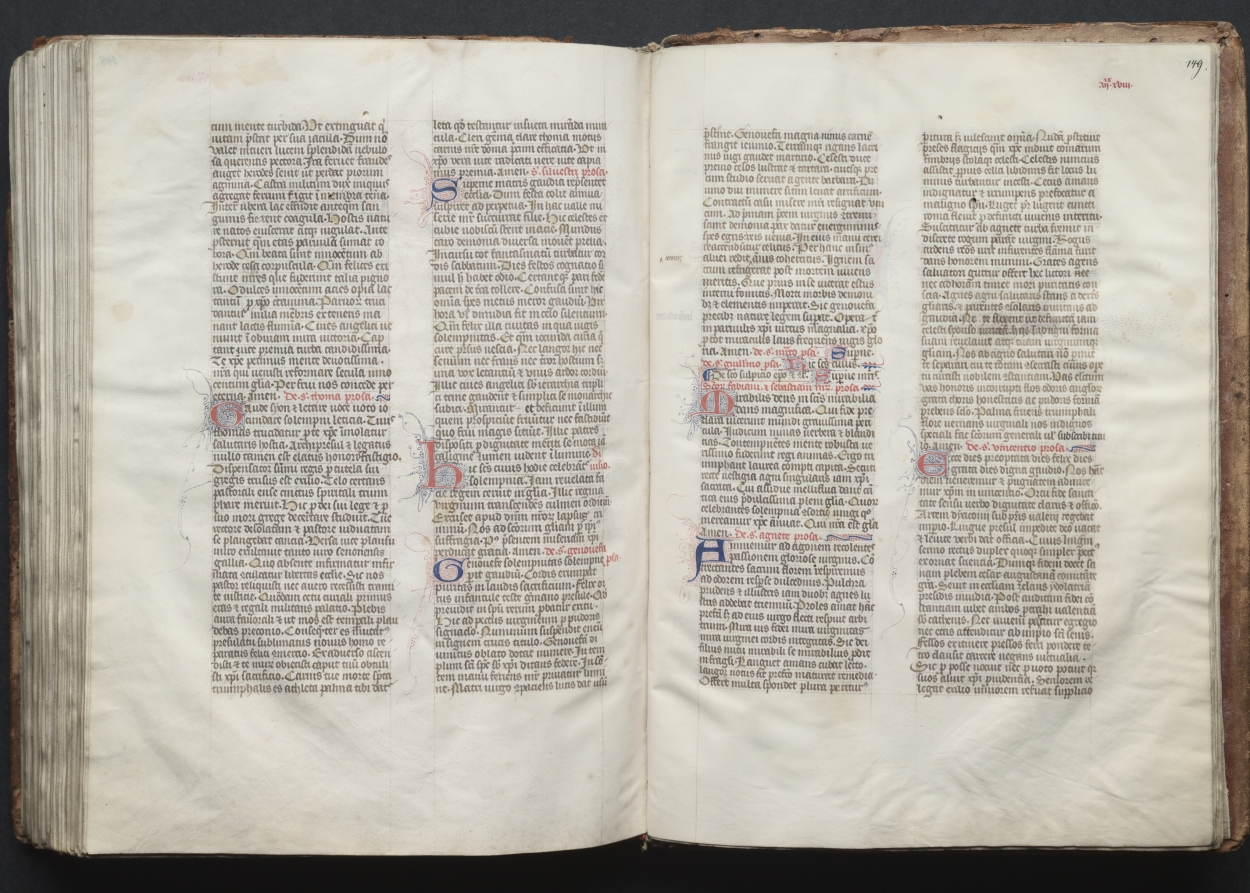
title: The Gotha Missal: Fol. 149r, Text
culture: France, Paris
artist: Master of the Boqueteaux (French)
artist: and Workshop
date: c. 1375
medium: ink, tempera, and gold on vellum; blind-tooled leather binding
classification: Bound Volume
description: The style and quality of this manuscript's decoration is typical of deluxe Parisian books made for aristocratic or royal patrons. Most of the book's decoration appears to be the work of the Master of the Boqueteaux, an artist active at the court of King Charles V (died 1380). His style was apparently shared by a number of book illuminators working in and around Paris. It is very possible that the Gotha Missal belonged to Charles V, but is not provable because the manuscript has no royal portraits and lacks a colophon. Given the book's magnificent decoration, however, it would seem that it was produced for a Valois prince, if not for the king himself. The manuscript receives its name from the German dukes of Gotha, its later owners.